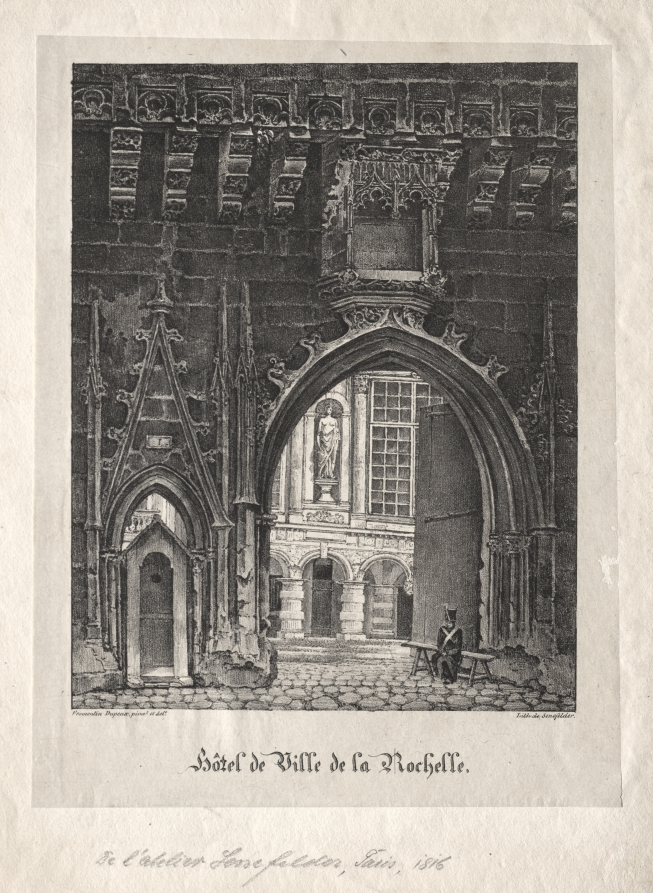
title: Hotel da Ville de la Rochelle, France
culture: Germany, 19th century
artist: Alois Senefelder (German, 1771–1834)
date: c. 1803–34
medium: lithograph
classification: Print